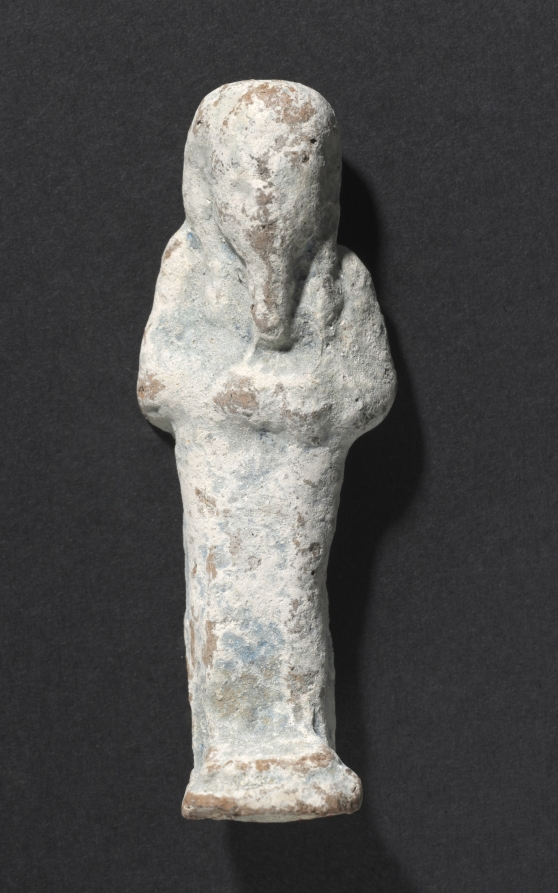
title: Shawabty of Ditamenpaankh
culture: Egypt, Late period (715–332 BCE), Dynasty 25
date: 715–656 BCE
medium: terracotta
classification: Funerary Equipment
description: High demand for shawabtys in the Late Period, a time when as many as 400 or more shawabtys were placed in the tomb with the deceased, gave rise to a specialized container for storing them: the shawabty box. This example is inscribed for the lady of the house, Ditamenpaankh, and was probably one of a pair originally made for her. The single-masted boat on the box's lid is perhaps an allusion to the pilgrimage of the deceased to the holy city of Abydos, the cult city of Osiris, king of the dead. The shawabtys inside are crude, mass-produced examples cast in an open mold. Made of terracotta, their blue paint imitates more costly shawabtys made of faience. As for the shawabty spell, it has been removed from its traditional location on the shawabty's front and relocated onto the sides of box, where it needed only to be written once, thus expediting production.